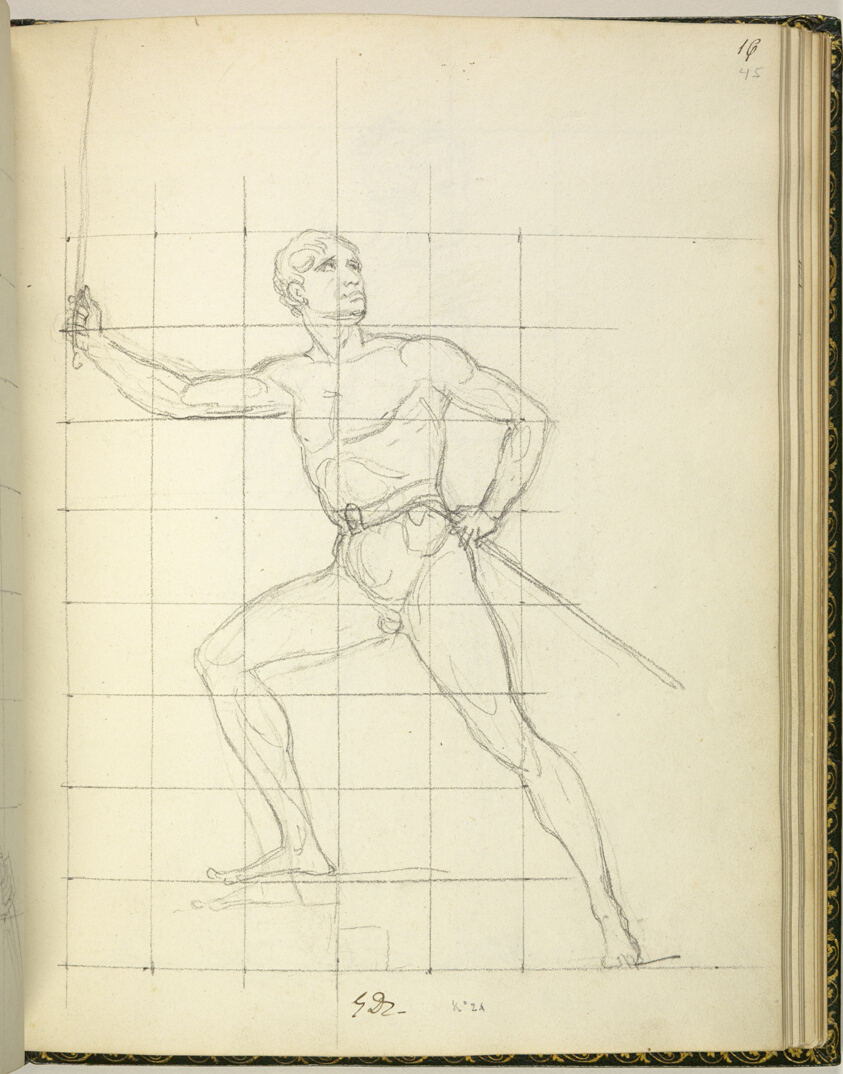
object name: Drawing and Watercolor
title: Sketchbook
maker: Jacques-Louis David; French, 1748-1825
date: 1809–10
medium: Graphite, black chalk, black crayon, and pen and brown ink drawings on wove paper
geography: France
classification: sketchbook; chalk; prints and drawing; paper